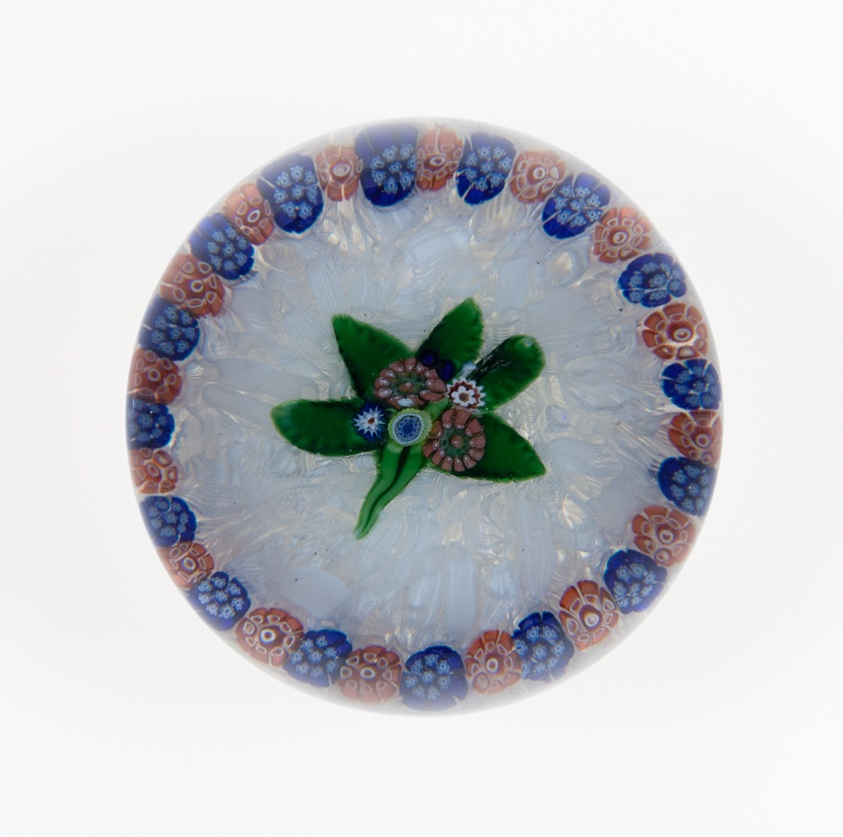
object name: Glass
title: Paperweight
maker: Saint-Louis Glassworks (Cristalleries de Saint-Louis); Lorraine, France, founded 1586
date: c. 1848–55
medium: Glass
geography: Saint-Louis-lès-Bitche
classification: paperweight; lampwork; european decorative arts; glass